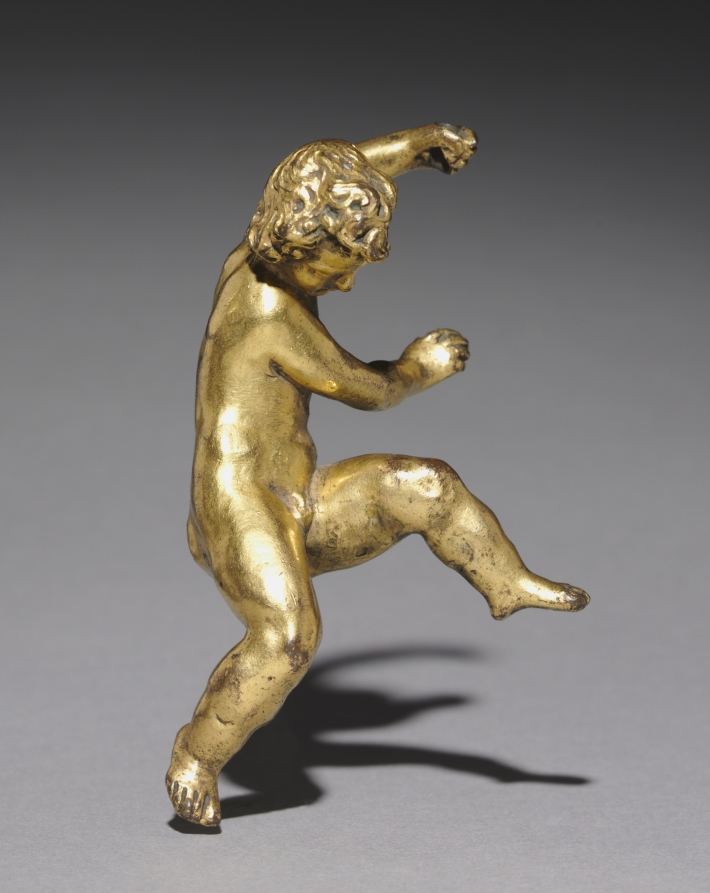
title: Putto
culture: Italy, Rome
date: late 1500s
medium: gilt bronze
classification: Sculpture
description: These gilt bronze putti, or figures of plump male children in the nude, are near mirror images of one another. Both are seated, with their arms flung to the side. Minimal detailing exists in the hands and feet, with the fingers and toes signified only by simple line indentations. The function and original placement of the putti is uncertain, but their posture and the placement of their hands suggest that originally they may have been placed in a larger statue group, perhaps holding either side of a banner, or even a piece of furniture. A will drawn up by Guglielmo della Porta in 1558 mentions the existence of bronze Passion scenes and crucifixes, suggesting that the artist may have created other small bronze groups as well. John Pope-Hennessey attributed these works to della Porta based on their similarity to the figures of Apollo and Artemis in Latona and her Children (Victoria and Albert Museum, London) and the monumental putti in his Tomb of Cardinal Paolo Cesi in Santa Maria Maggiore in Rome, although more recent research points away from della Porta as the maker. Ana Dieglio 2009